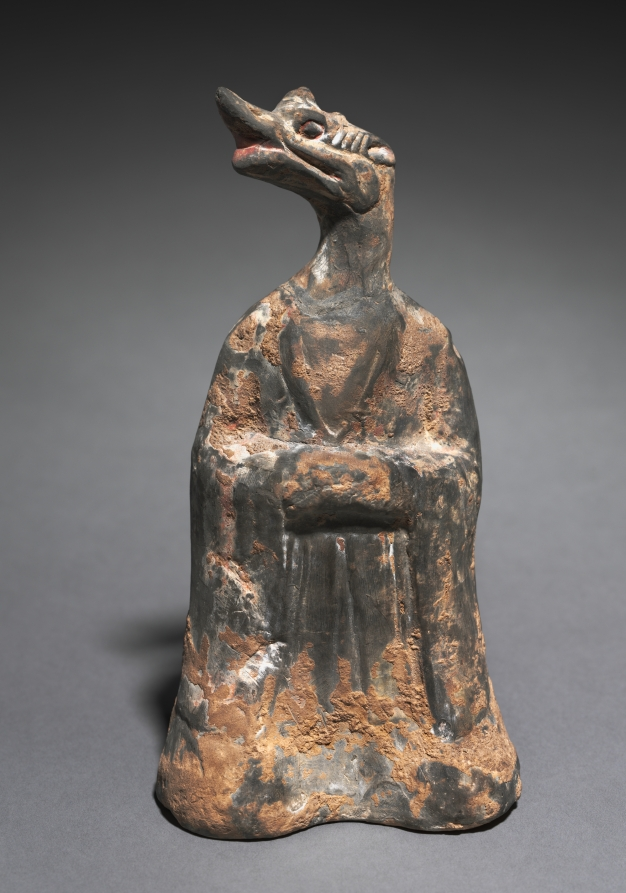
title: Mortuary Figure of the Zodiac Sign: Dragon (Leo)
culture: China, Northern Wei dynasty (386-534)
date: 500s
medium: gray earthenware with traces of slip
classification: Sculpture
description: The twelve-animal zodiac series—rat, ox, tiger, rabbit, dragon, snake, horse, goat, monkey, rooster, dog, and boar—signifies a traditional Chinese concept of time structured in a cyclical order. The twelve animals are also linked to the art of fortune-telling that underlies human existence in connection with the changes of the universe. The use of the twelve zodiac animals as tomb furniture suggests they provided a cosmological structure for the afterlife.